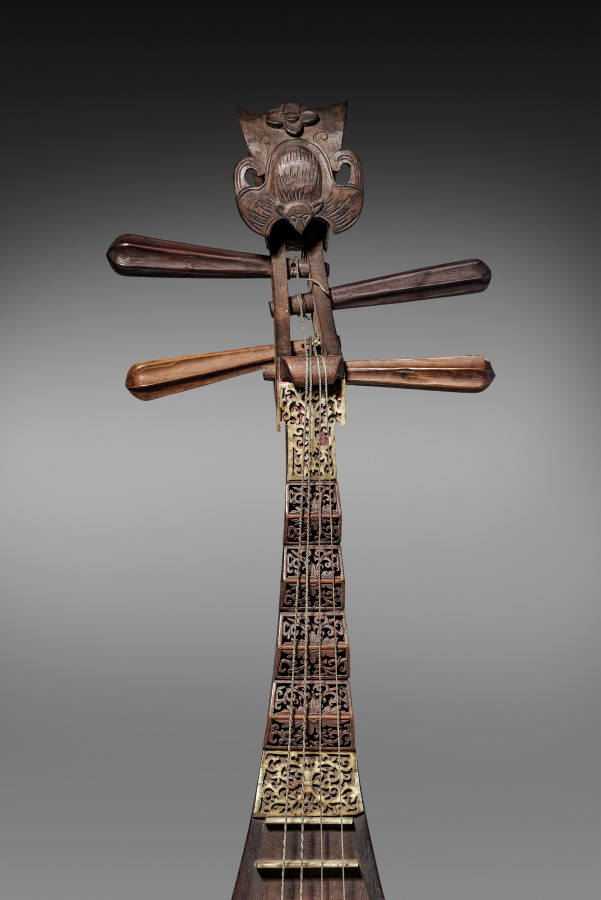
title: Pipa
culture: China, Qing dynasty (1644-1911)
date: 1800s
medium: Wood, ivory, bone, gut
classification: Musical Instrument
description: The term pipa, known since the 3rd century BC, describes the playing motion of the right hand: pi, “to play forward” (left), and pa, “to play backward” (right). A type of lute played with the fingers, it is used in opera and storytelling ensembles and has an impressive, virtuosic solo repertoire. Historic imagery, such as wall paintings, documents the spread of the pipa, along the Silk Road from western and central Asia to China. The bat finial here is a commonly used device on 19th-century Chinese lutes symbolizing good luck.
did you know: The string holder is made of bone.